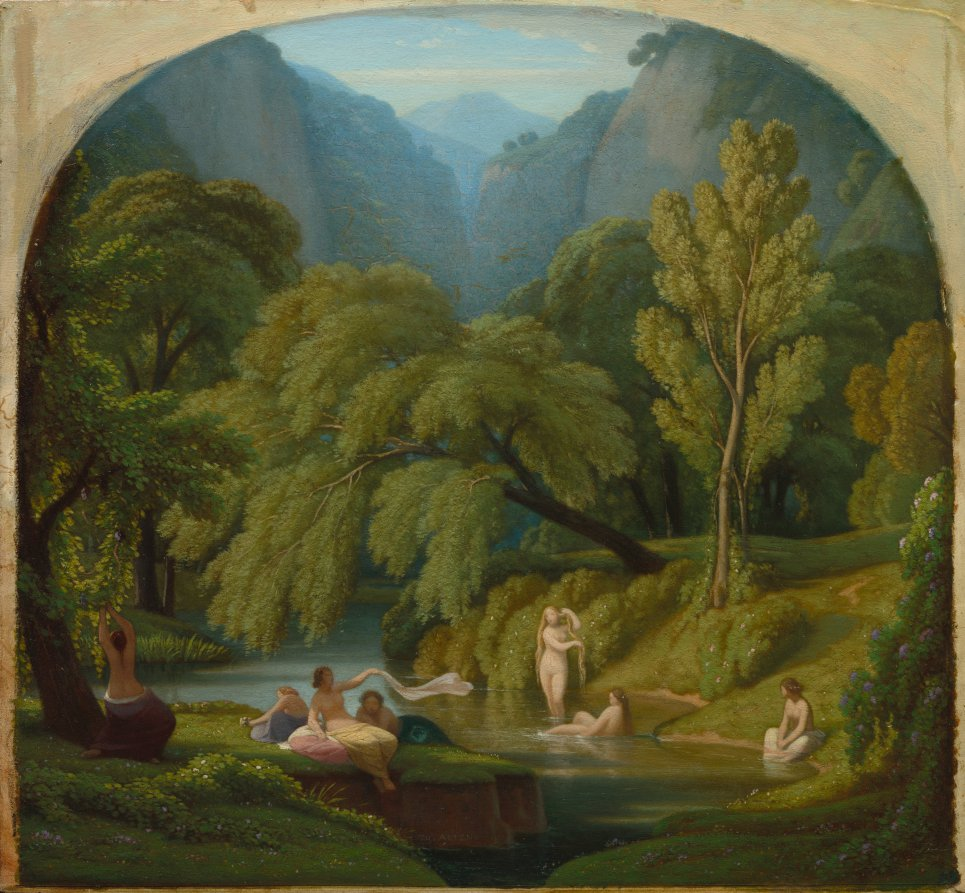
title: The Bathers, Souvenir of the Banks of the Anio River at Tivoli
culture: France, 19th century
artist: Théodore Caruelle d' Aligny (French, 1798–1871)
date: c. 1860/1861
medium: oil on wood panel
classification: Painting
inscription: Signed lower center: th. aligny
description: Although painted in France, this work depicts bathers near Tivoli, a popular, parklike estate near Rome, famous for its fountains, picturesque hills, and lush forests. As was the custom for many artists of the 19th century, d'Aligny traveled to Italy to study. He remained there from 1825 until 1827, making careful drawings and oil sketches directly from the Roman countryside. He would often use these works to compose more finished paintings in his studio. Although d'Aligny visited Italy twice more, his last trip was in 1843. This painting, made years after that date, is therefore a true souvenir, that is, a recollection evoking his experiences in Italy